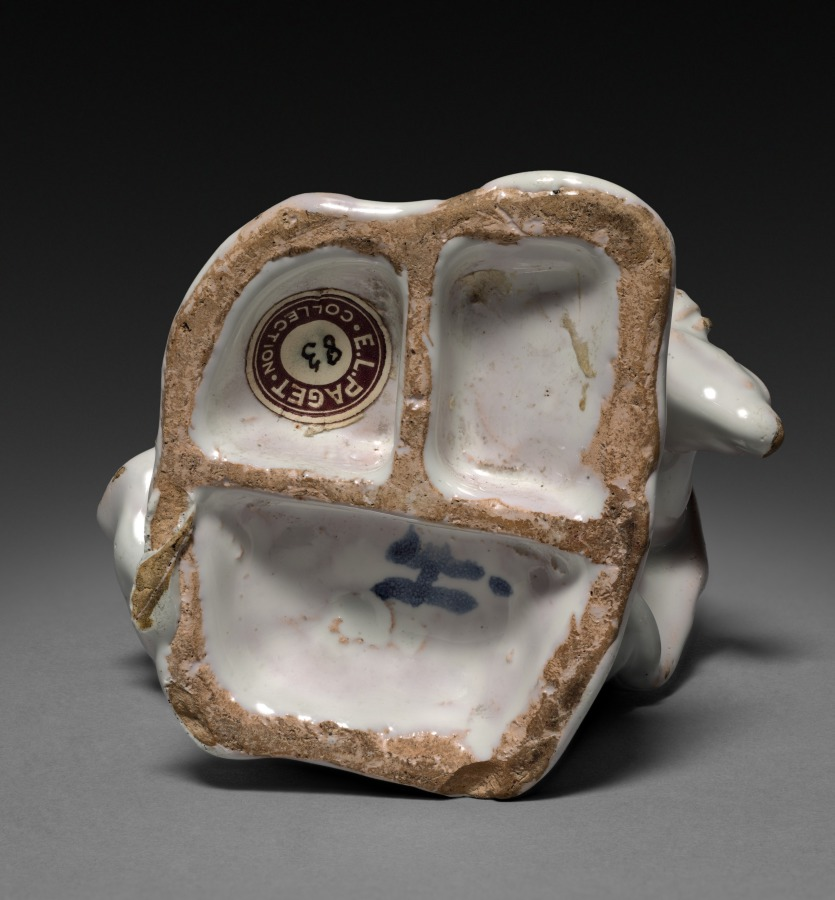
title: Seated Musician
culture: France, Strasbourg, 18th century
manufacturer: Strasbourg Factory (France)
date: c. 1740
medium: faience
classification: Ceramic